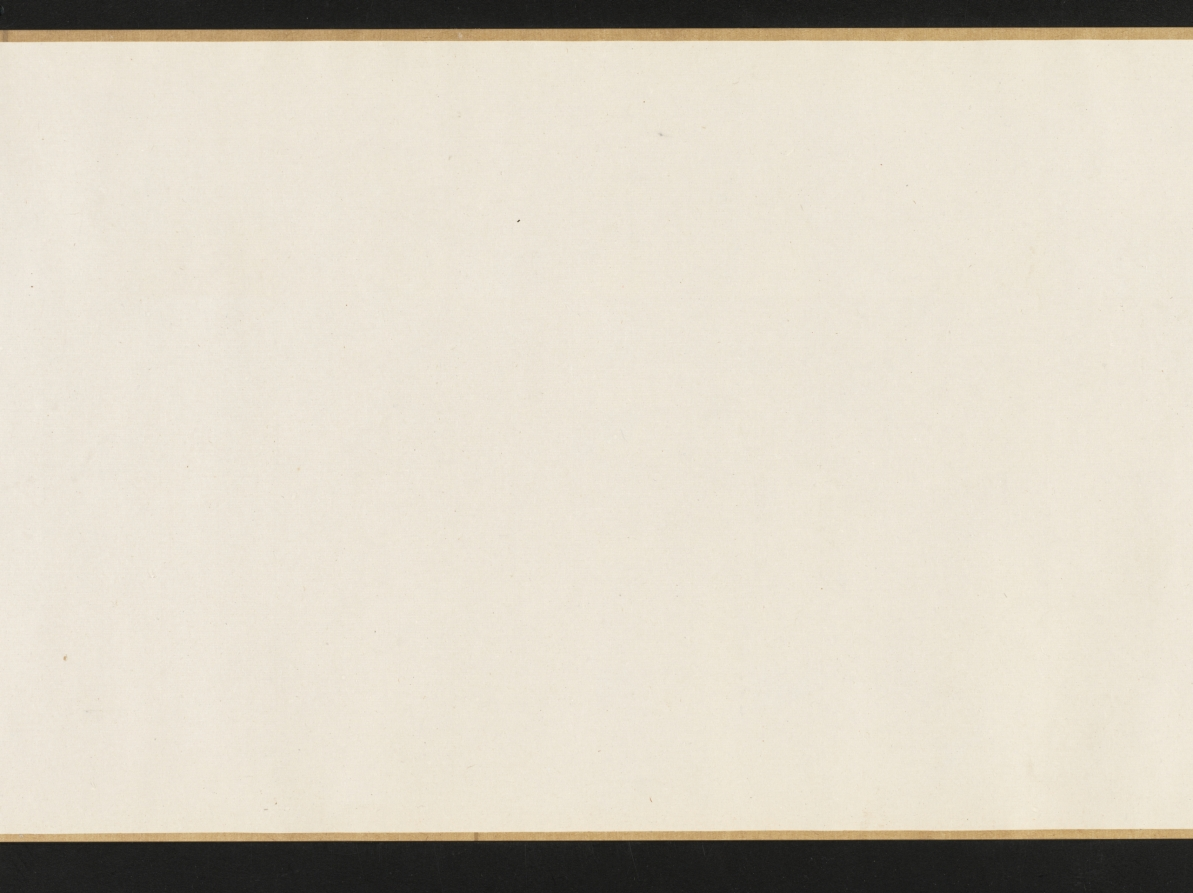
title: The Lantern Night Excursion of Zhong Kui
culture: China, Yuan dynasty (1271-1368)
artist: Yan Hui (Chinese, active 1270–1310)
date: late 1200s–early 1300s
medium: handscroll; ink and slight color on silk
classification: Painting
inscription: Artist's signature [and probable seal]: Yan Qiuyue 顏秋月 Title on frontispiece and 1 seal of Niu Shuyu 鈕樹玉 (1760–1827): Qiuyue mohuan 秋月墨幻 [Qiuyue's Ink Fantasy]. 31 additional seals: 2 of Yang Shiqi 楊士奇 (1365–1444); 2 of An Guo 安國 (1481–1534); 8 of Xiang Yuanbian 項元汴 (1525–1590); 2 of Geng Zhaozhong 耿昭忠 (1640–1686); 4 of Pu Tung 溥侗 (1870–1952); 7 of Tan Jing 譚敬 (1911–1991); 1 of Liu Ting-chih (20th c.); 5 unidentified.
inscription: An inscription by Zizhi Shanren 紫芝山人 [probably Jiang Hui 蔣惠], dated 1389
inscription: An inscription by Wu Kuan 吳寬 (1436–1504)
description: Here, the demon queller Zhong Kui leads a nightly procession of street entertainers with bare, muscular bodies and demonic faces. Some wear shabby clothes, and all perform stunts and tricks to astound and scare the viewer. In fact, a New Year custom in cities of southeast China had the poor, disguised as demons, process through the streets and play their tricks to clear households of evil spirits and welcome the spring. From right to left, a demonic figure leads the procession and beats a drum; another lifts a large rock; one stands on his hands trying to drink; one balances a jar on his elbow; three hold and wield weapons; one carries a folded chair covered by a cow’s skin; another holds Zhong Kui’s qin (zither), books, brush, and inkstone. At the end of the scroll, two figures offer a cup and bottle of wine to Zhong Kui, who lifts his hand in command.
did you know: Zhong Kui was an ancient ghostbuster.